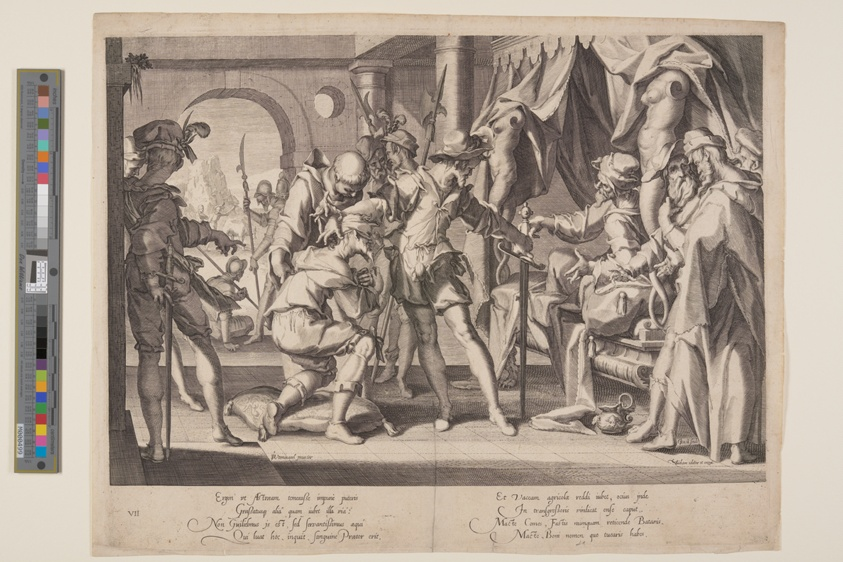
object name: Print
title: Count William Permitting Beheading, plate 7 from Thrones of Justice (Thronus Iustitiae)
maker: Willem van Swanenburgh (Dutch, 1580–1612); after Joachim Wtewael (Dutch, 1566–1638)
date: 1606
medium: Engraving on ivory laid paper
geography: Netherlands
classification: print; paper; prints and drawing; engraving